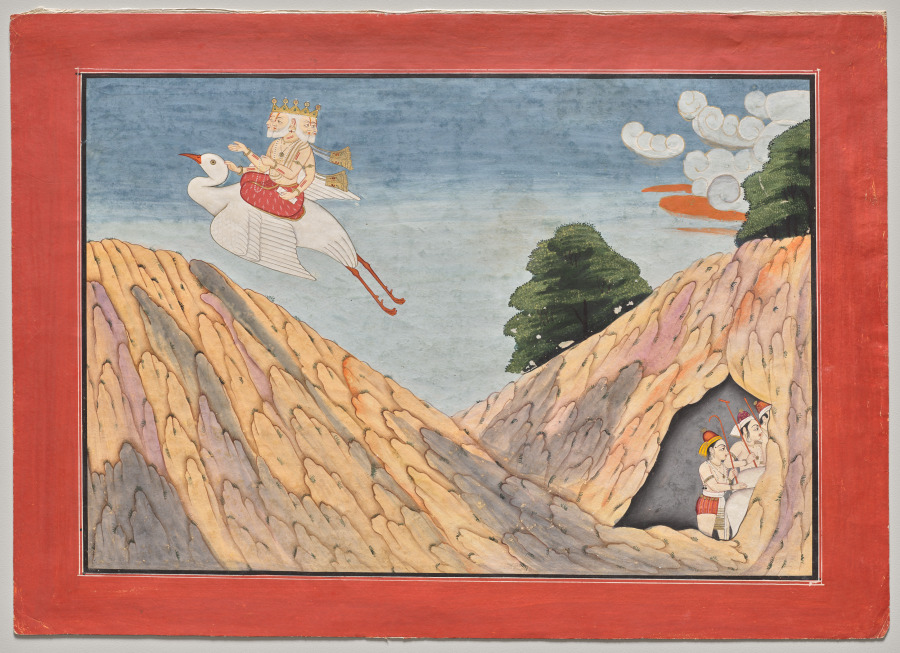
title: Brahma Hides the Cowherds and the Calves in the Cave, page from a Bhagavata Purana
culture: India, Pahari Hills, Basholi School, 18th century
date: c. 1760–65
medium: Gum tempera, ink, and gold on paper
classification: Painting